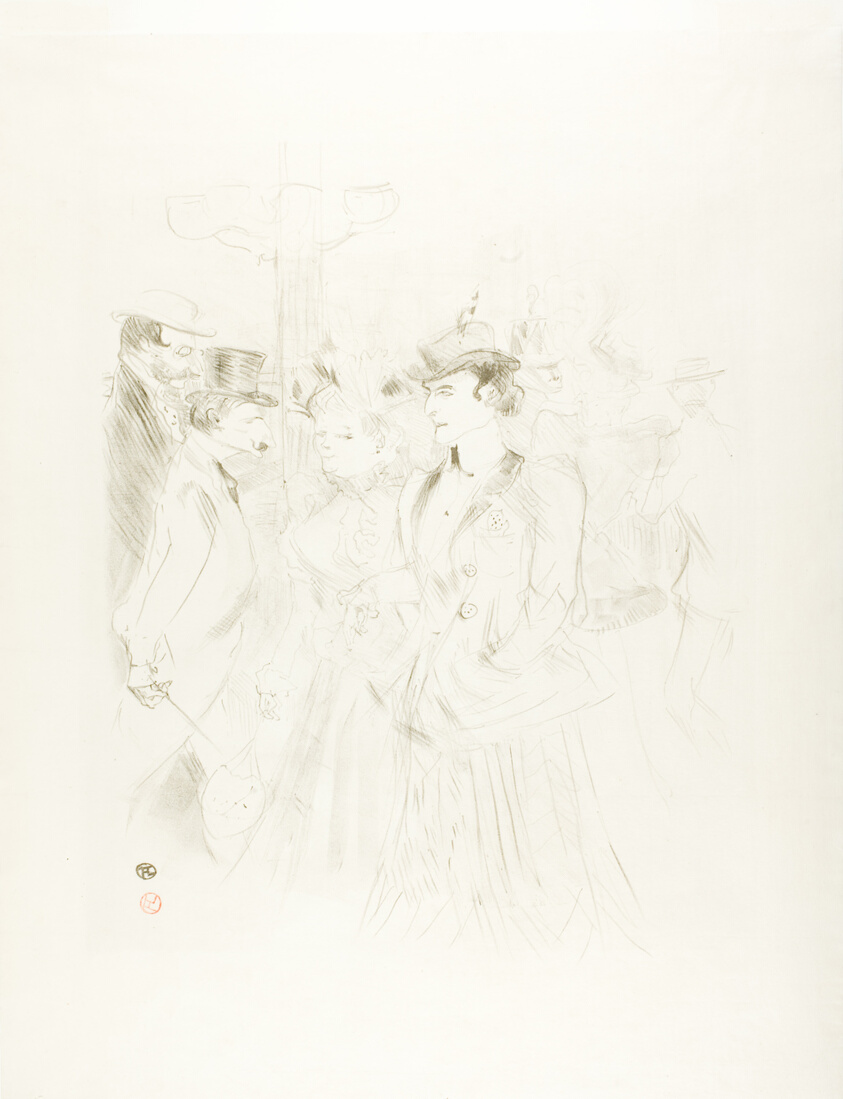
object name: Print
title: Promenade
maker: Henri de Toulouse-Lautrec (French, 1864-1901)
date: 1899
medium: Color lithograph on cream wove paper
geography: France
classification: lithograph; print; prints and drawing